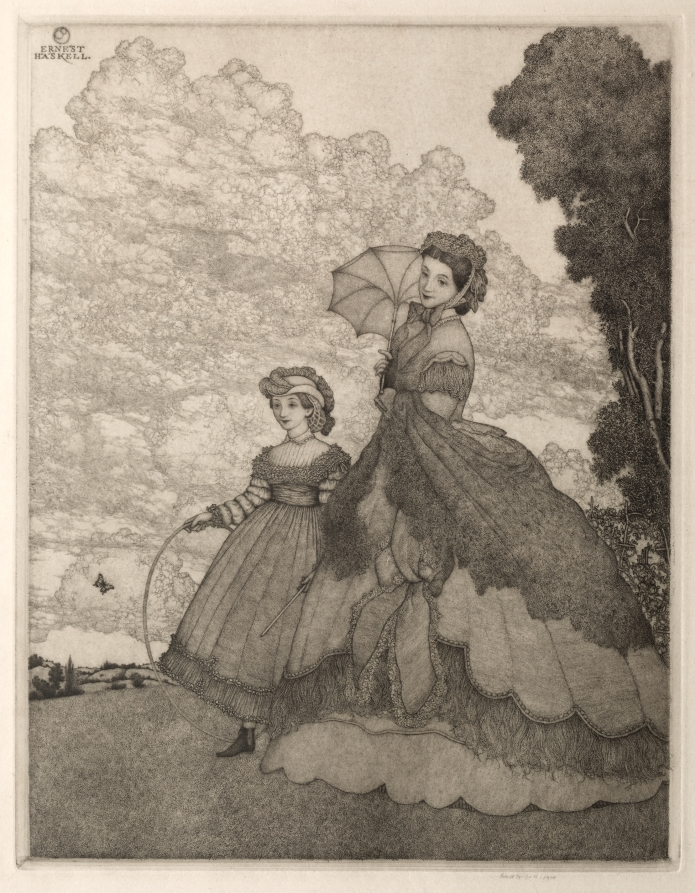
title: The Hilltop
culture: America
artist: Ernest Haskell (American, 1876–1925)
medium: engraving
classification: Print